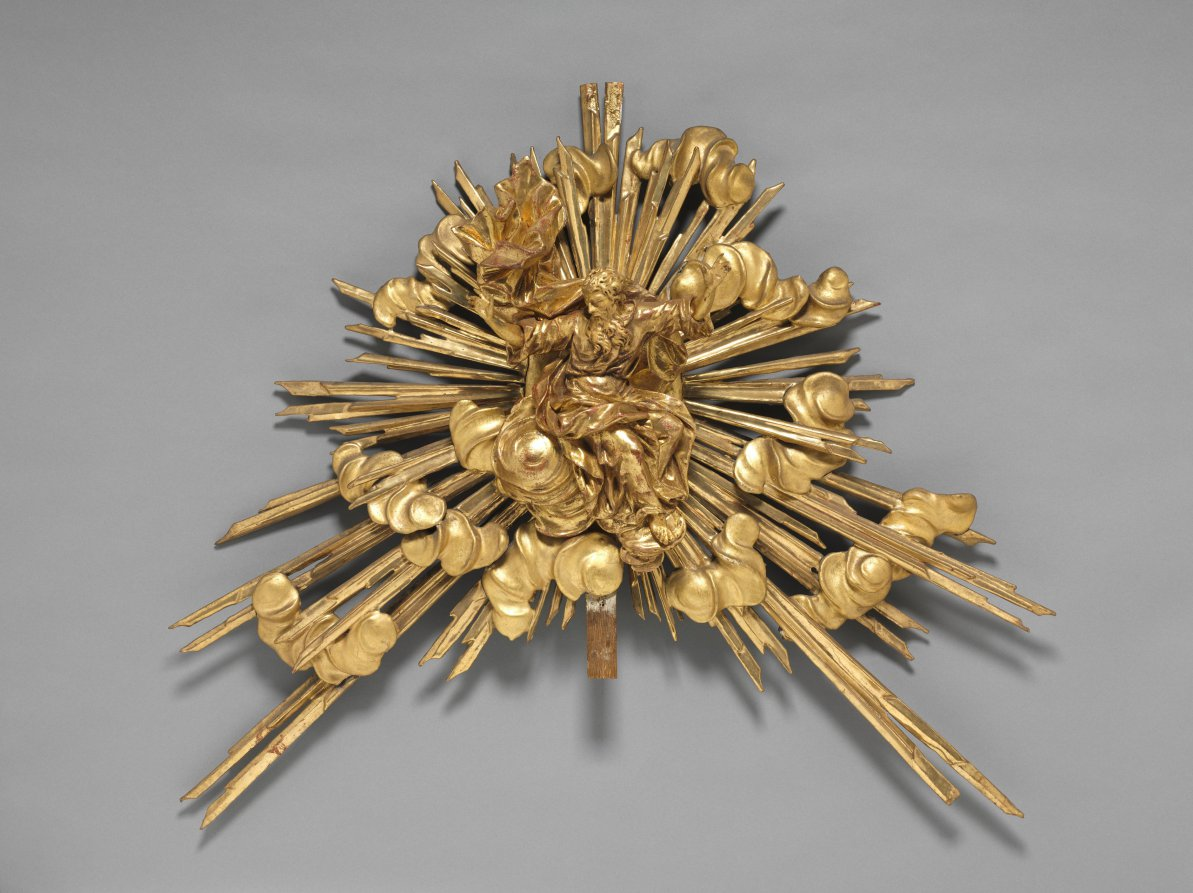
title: Altarpiece with Relics - God the Father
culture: Germany, Bavaria, 18th century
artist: Joseph Matthias Götz (German, 1696–1760)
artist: and Workshop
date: 1735–40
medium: gilded wood, with relics in niches: gilded wood, mother-of-pearl, ebony, red silk, gold wire, seed pearls, rock crystal, pen and ink on paper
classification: Sculpture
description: Götz covers every surface in gold leaf, giving each part of the object equal importance, rather than simply framing a central picture. In this distinctively Central European approach, figural narrative is subordinate to the overall ensemble. Götz designed this object to rest on top of an altar, probably in front of a larger painted or sculpted decorative scheme. The work contains relics seen through the small windows on the perimeter. These small remains of holy figures demonstrate the persistence of a medieval Catholic tradition well into the 1700s.